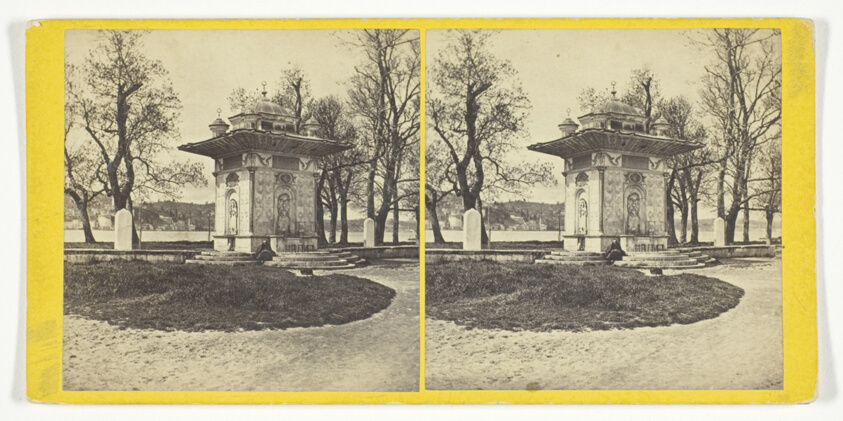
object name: Photograph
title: Contantinople - Fountain of Sweet Waters on the Asiatic Shore of the Bosphorus, stereo, No. 237 from "Good's Eastern Series"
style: 19th century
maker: Frank M. Good; English, active 1860-1890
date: 1860/90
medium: Albumen print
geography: Istanbul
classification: photography; photograph; albumen silver print; stereograph (albumen)